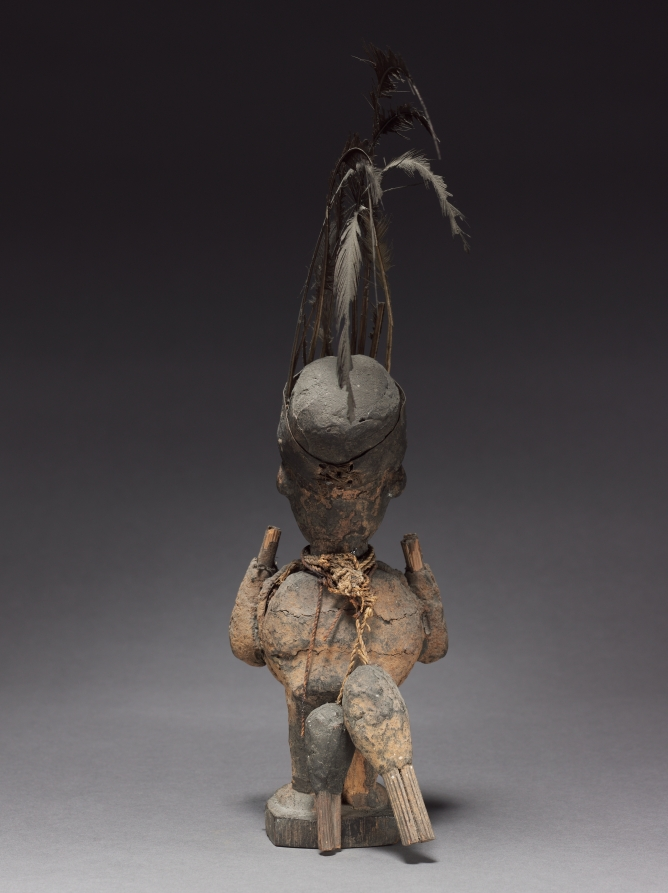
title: Power figure (nkisi)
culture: Africa, Central Africa, Republic of the Congo, Kongo-style maker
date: late 1800s-early 1900s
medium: Wood, metalized glass, organic materials (including resin), feathers, plant fibers, iron, and copper alloy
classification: Sculpture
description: One of seven minkisi figures previously in the René and Odette Delenne collection, this object contained medicines in which an ancestral spirit was believed to reside. This figure is one of the two tallest in the collection. Feathers of a bird of prey adorn its head, with two small guns pointing upward and a third hanging down. It had belonged to “the sorcerer of Louboulou.”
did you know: This is one of two tallest in the collection of spiritual figurines loaded with gunpowder to shoot at witches: nduda, or “night guns.”